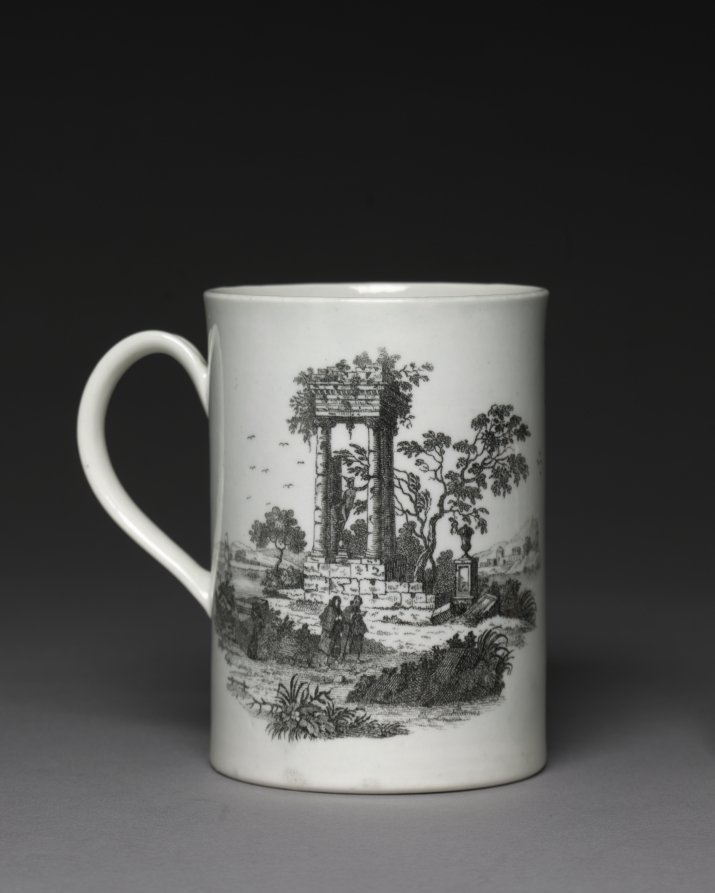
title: Mug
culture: England, Worcester, 18th century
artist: Worcester Porcelain Factory (British, established 1751)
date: c. 1760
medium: soft-paste porcelain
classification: Ceramic